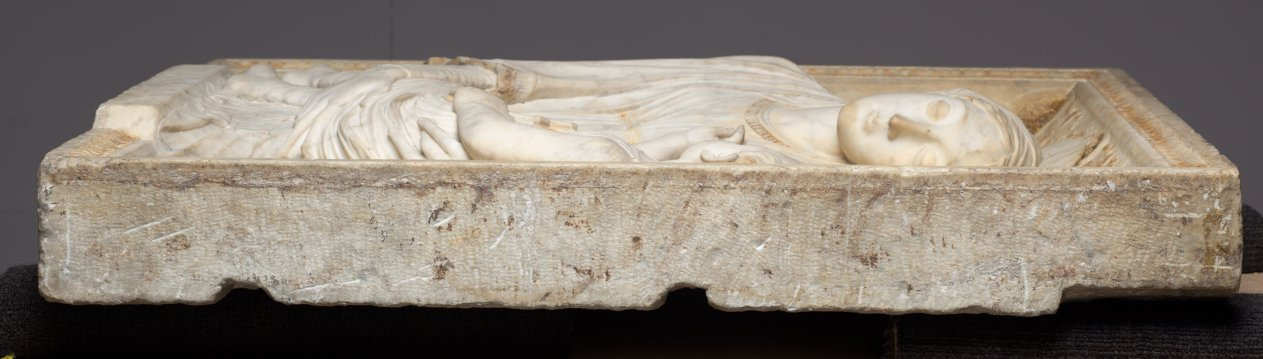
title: Madonna and Child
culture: Italy, Rome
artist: Mino da Fiesole (Italian, c. 1430–1484)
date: by 1461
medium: marble with traces of gilding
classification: Sculpture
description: This relief is one of four produced for the ciborium (canopy) erected by Cardinal Guillaume d'Estouteville over the high altar of the church of Santa Maria Maggiore in Rome. The ciborium was taken apart in 1747 and the other three panels--Christ Blessing, The Annunciation, and Saints Peter and Paul--were set into the walls of the sacristy.